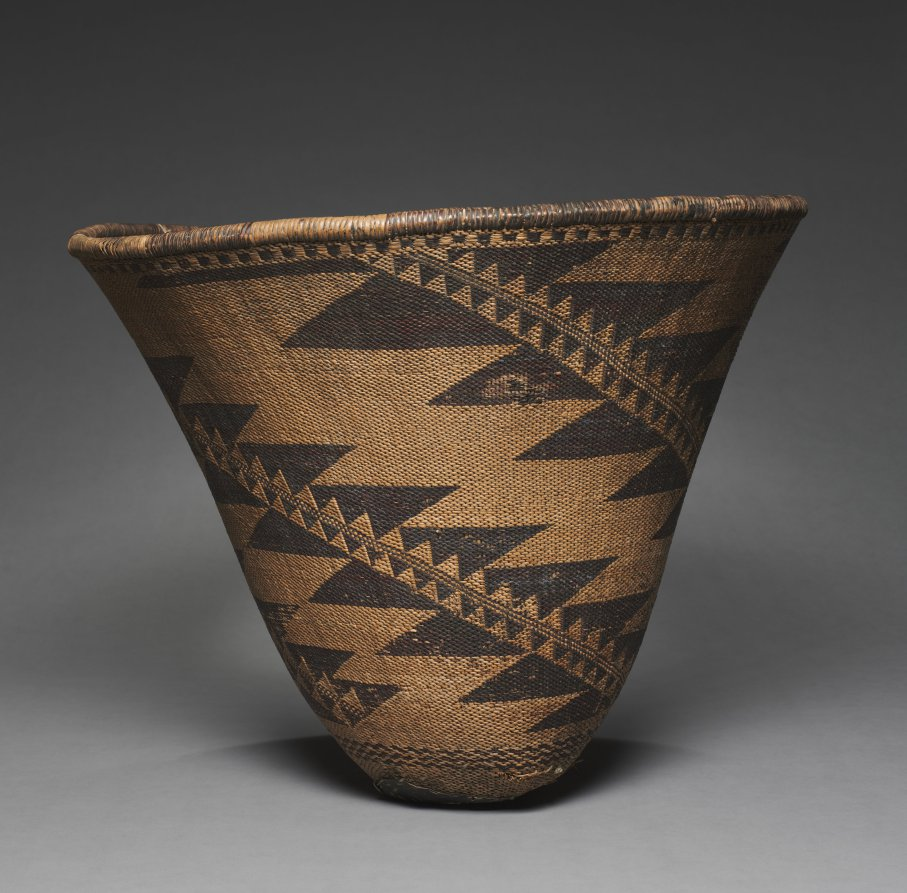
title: Burden Basket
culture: California, Pomo, central, late 19th century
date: 1880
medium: redbud, sedge; diagonal twine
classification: Basketry